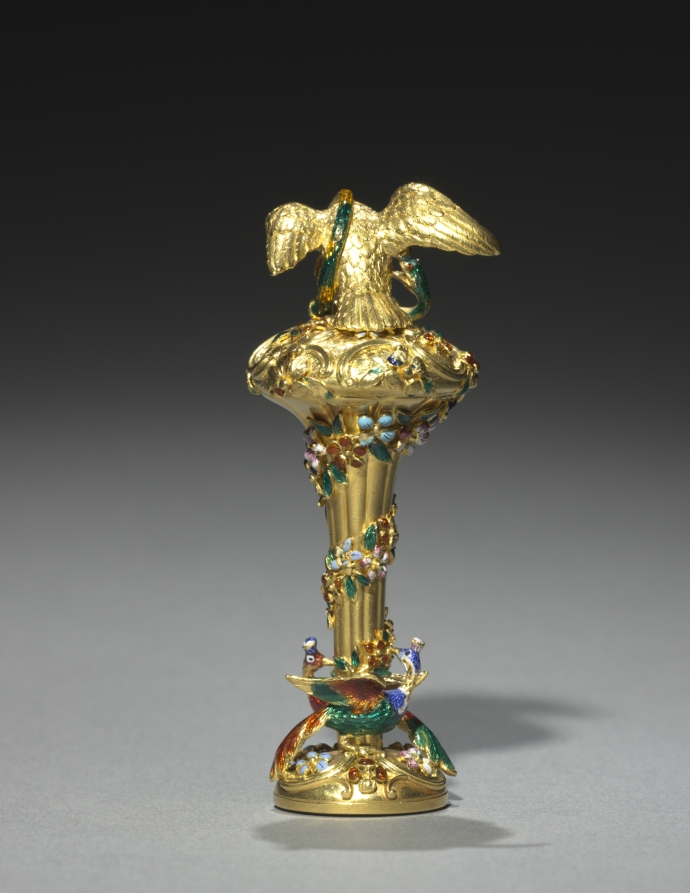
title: Hand Seal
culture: Russia, St. Petersburg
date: c. 1839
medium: gold with transparent enamels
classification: Miscellaneous